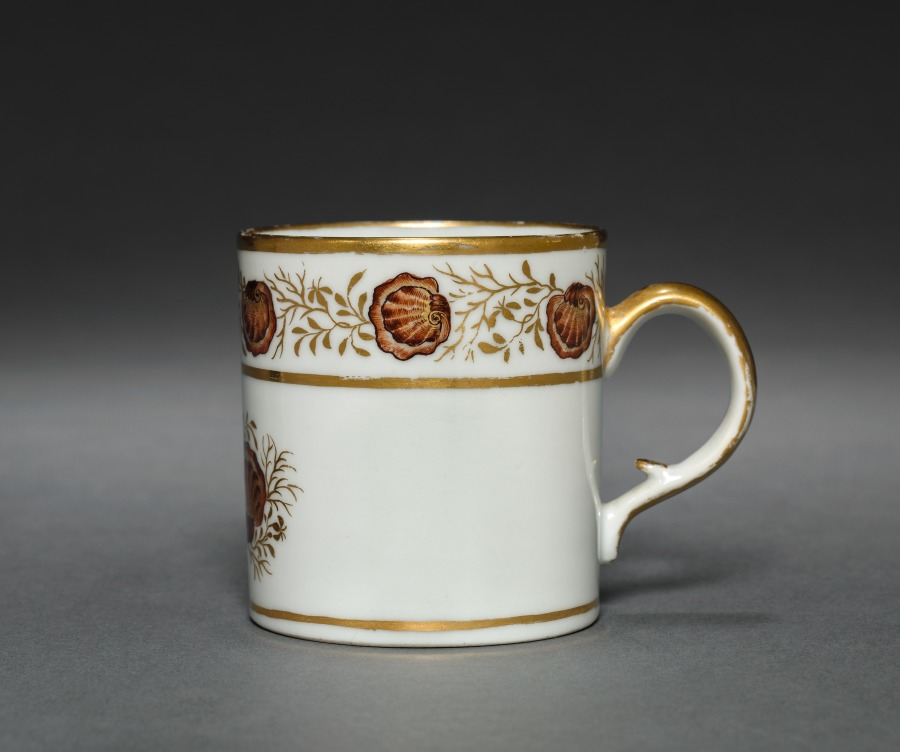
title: Cup from Oliver Wolcott, Jr. Tea Service (1 of 6)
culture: Chinese Export porcelain, late 18th-early 19th century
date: 1785–1805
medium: porcelain, sepia enamel, gold leaf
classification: Ceramic